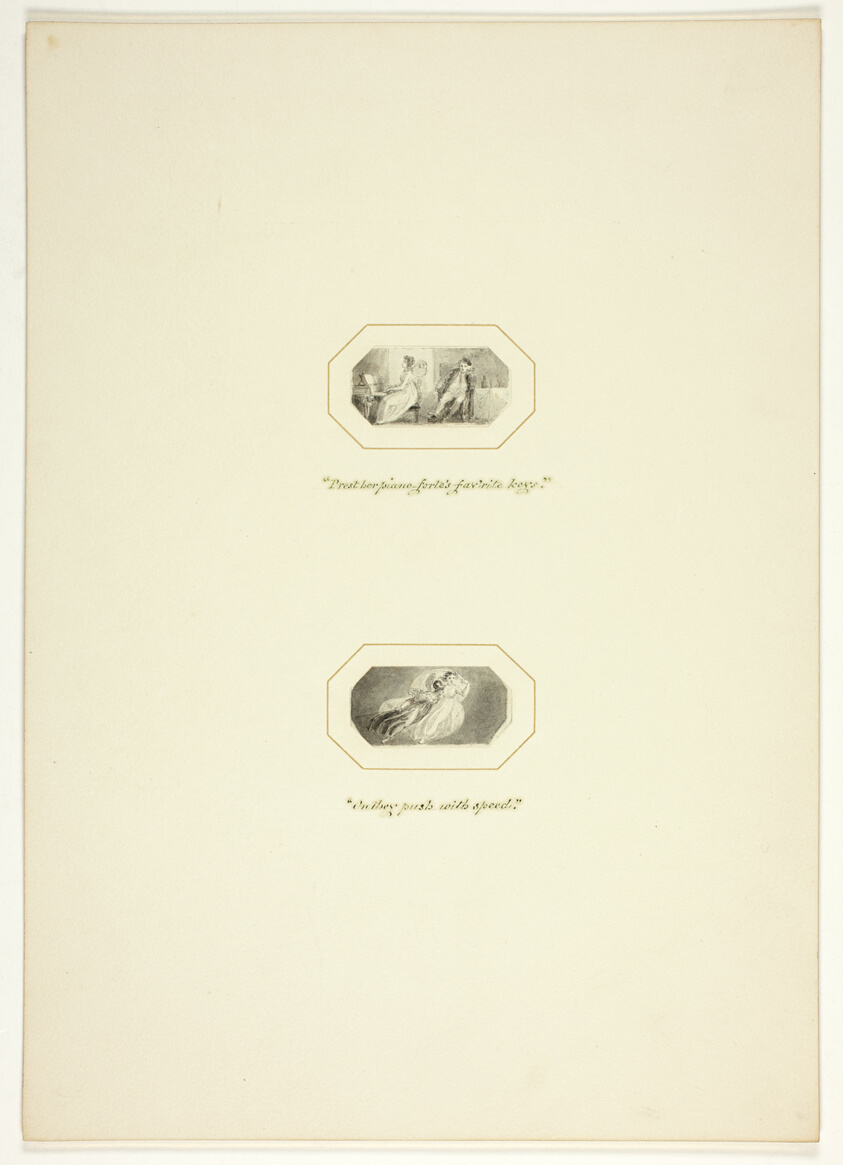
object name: Drawing and Watercolor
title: Study for a plate from The Triumphs of Temper, in the 1796 Royal Engagements Pocket Book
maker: Thomas Stothard (English, 1755-1834)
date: c. 1795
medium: Ink wash on paper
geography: England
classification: ink or chalk wash; drawings (visual works); prints and drawing